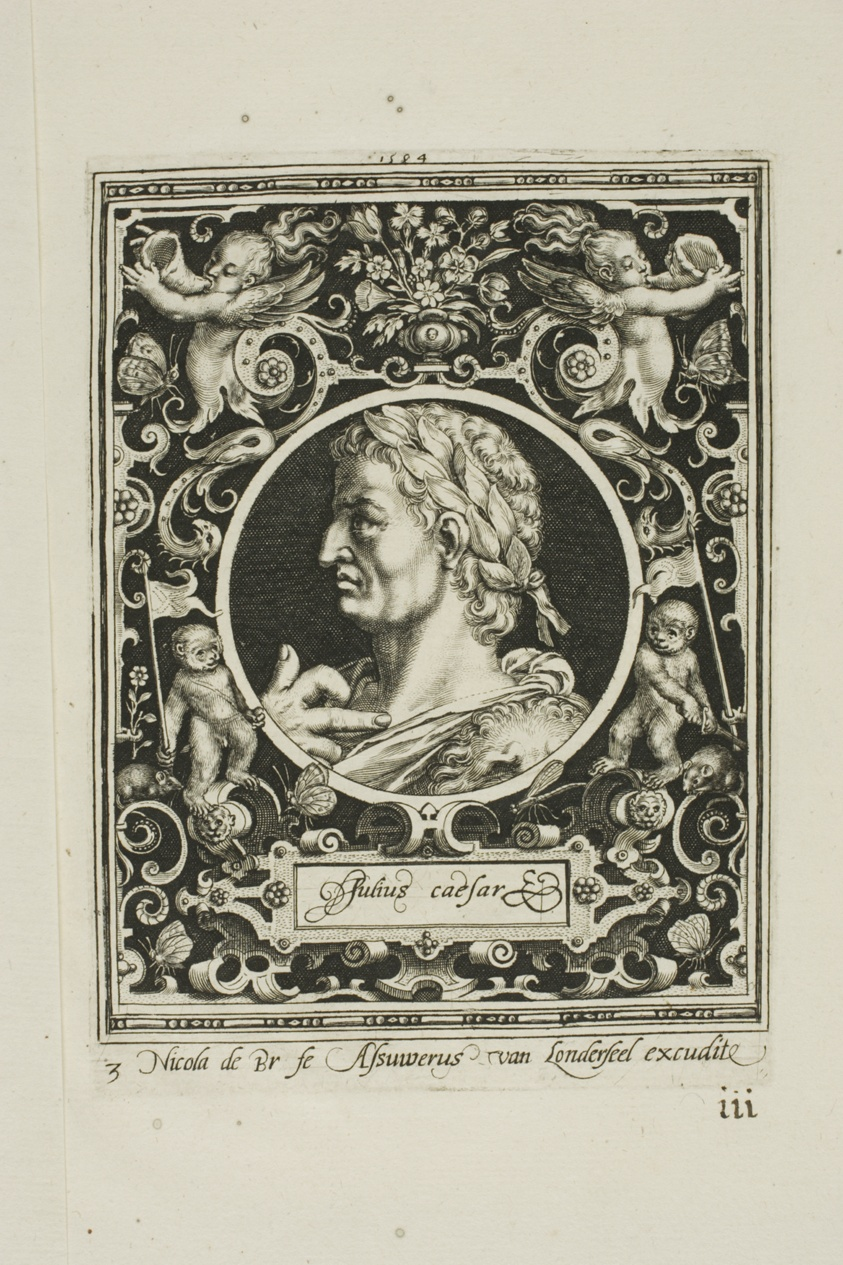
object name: Print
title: Julius Caesar, plate three from The Nine Worthies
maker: Nicolaes de Bruyn (Flemish, 1571-1656); published by Assuerus van Londerseel (Flemish, 1572-1635)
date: 1594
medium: Engraving in black on cream laid paper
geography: Flanders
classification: engraving; prints and drawing; print